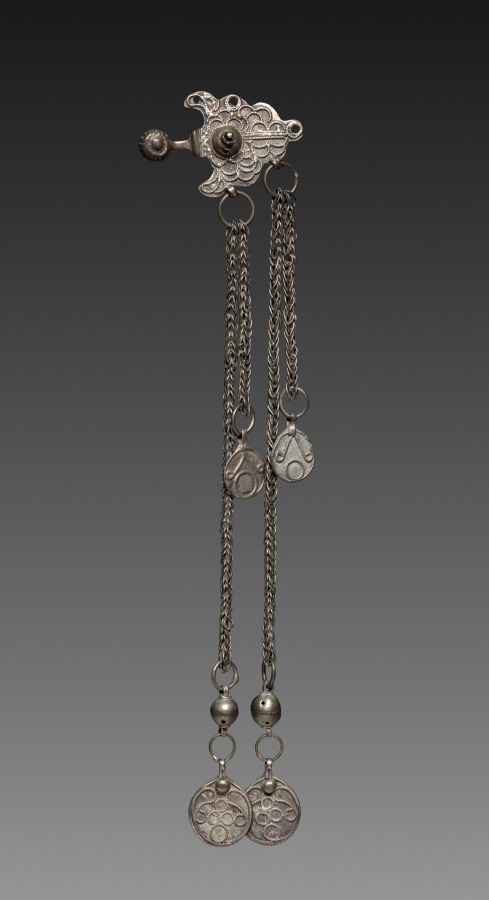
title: Clasp (part 2)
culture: Palestine, Ramallah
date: early 1900s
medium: silver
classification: Jewelry